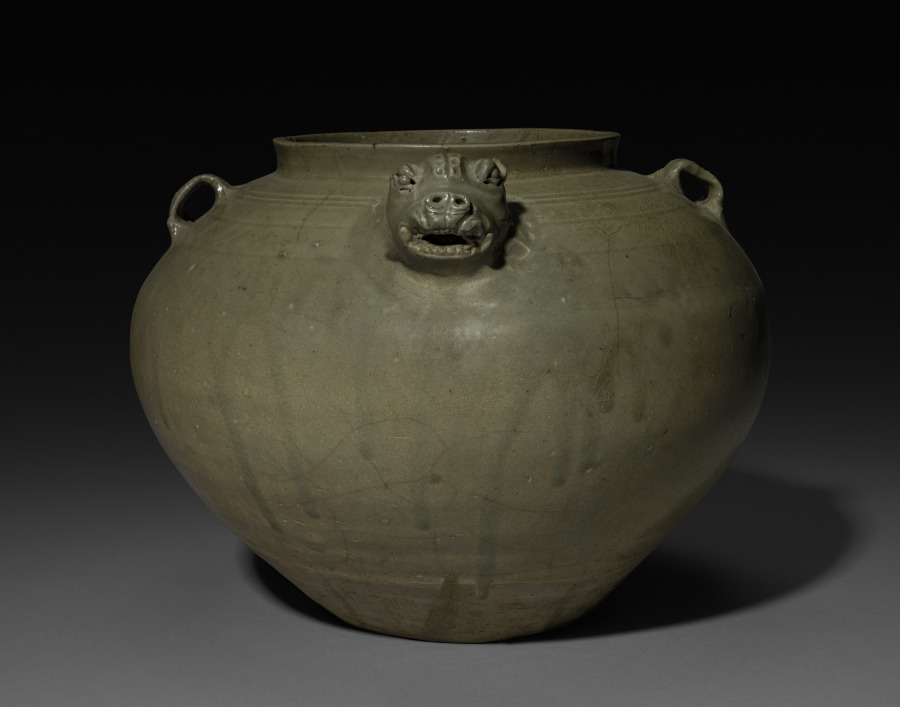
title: Jar with Tiger-Headed Spout: Yue Ware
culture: China, Western Jin dynasty (265-316 CE)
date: late 200s–late 300s CE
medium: glazed stoneware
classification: Ceramic